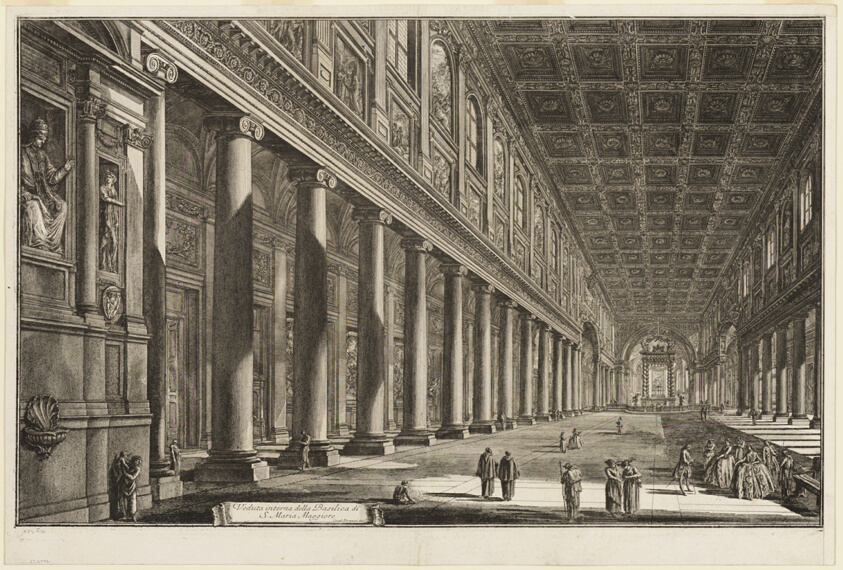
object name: Print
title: Interior view of the Basilica of S. Maria Maggiore, from Views of Rome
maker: Giovanni Battista Piranesi (Italian, 1720-1778)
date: 1768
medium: Etching on ivory laid paper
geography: Italy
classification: etching; print; prints and drawing